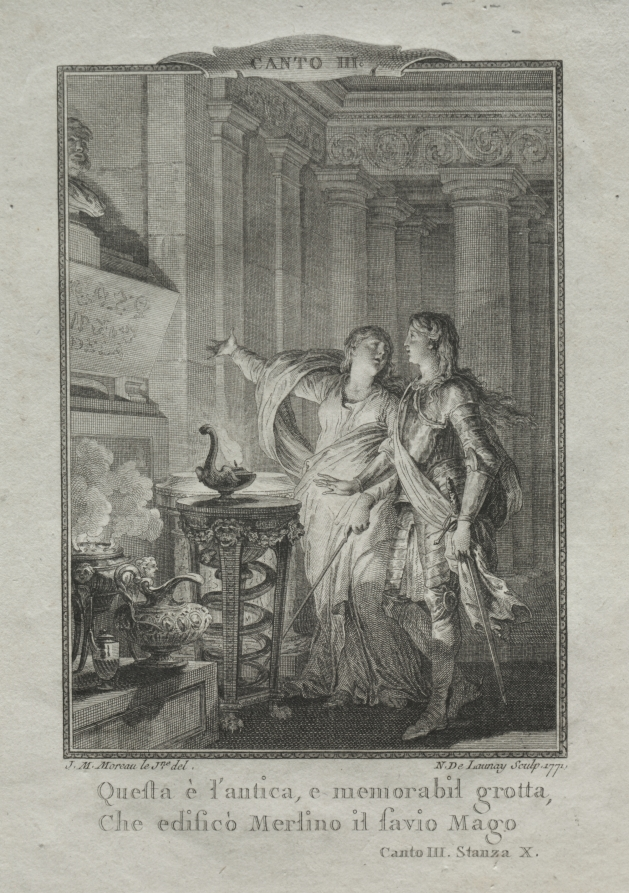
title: In the Grotto of Merlin, the Magician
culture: France, 18th century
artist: Nicolas Delaunay (French, 1739–1792)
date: 1771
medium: engraving and etching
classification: Print